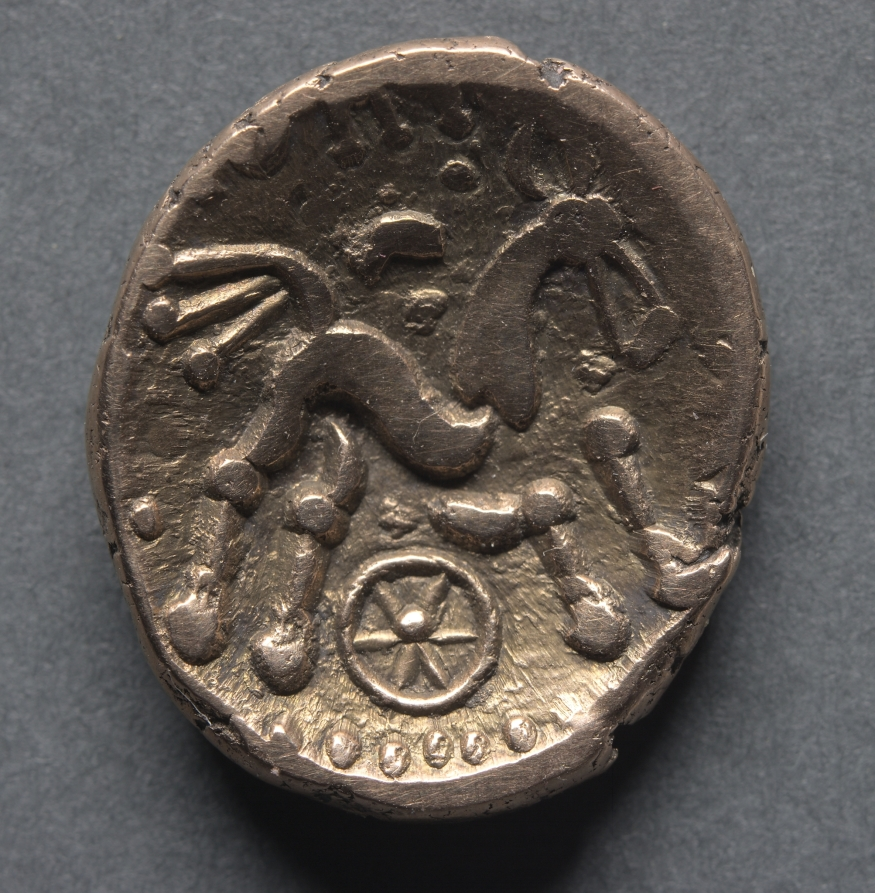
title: Catti Stater: Tree Symbol on Plain Field (obverse)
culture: England, Dobunni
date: 20–45 CE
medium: gold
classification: Coins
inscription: CATTI